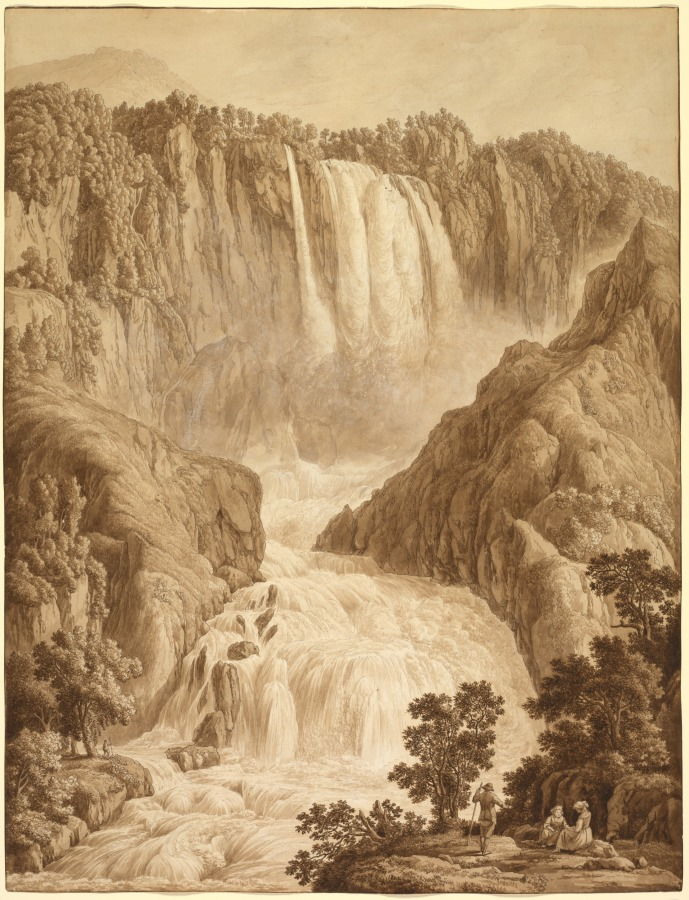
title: The Waterfall of Marmore at Terni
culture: Germany, 18th century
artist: Philipp Hackert (German, 1737–1807)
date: 1776–78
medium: pen and black ink, brush and brown wash, with white gouache and graphite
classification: Drawing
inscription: on fragments of old mount, now removed, in brown ink: No. 177. 13. [crossed out] / No: 17.; in graphite: No ["o" underlined] 27.; in graphite: 116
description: Influenced by the landscapes of Claude Lorrain and seventeenth-century Dutch artists, the German Jakob Philipp Hackert was one of the most successful landscape artists based in late 18th-century Rome. His precise renderings of beautiful and historic sites attracted an international clientele on the European grand tour. This finished drawing depicts one of Italy's most spectacular natural phenomena, the Marmore waterfall at Terni, located north of Rome. Hackert carefully crafted the composition so that the detailed cliffs covered with foliage frame the tiered cascade from its soaring heights to its final emptying in the foreground. Hackert was known for traveling to the countryside on foot with large portfolios so that he could execute complete wash drawings like this one directly in nature. He probably drew this scene during one such sketching tour in 1776, or 1778.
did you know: This work recalls the words written by the artist's close friend, Johann Wolfgang von Goethe, who declared that an artist should "give his work of art a content and a form through which it appears both natural and beyond Nature."